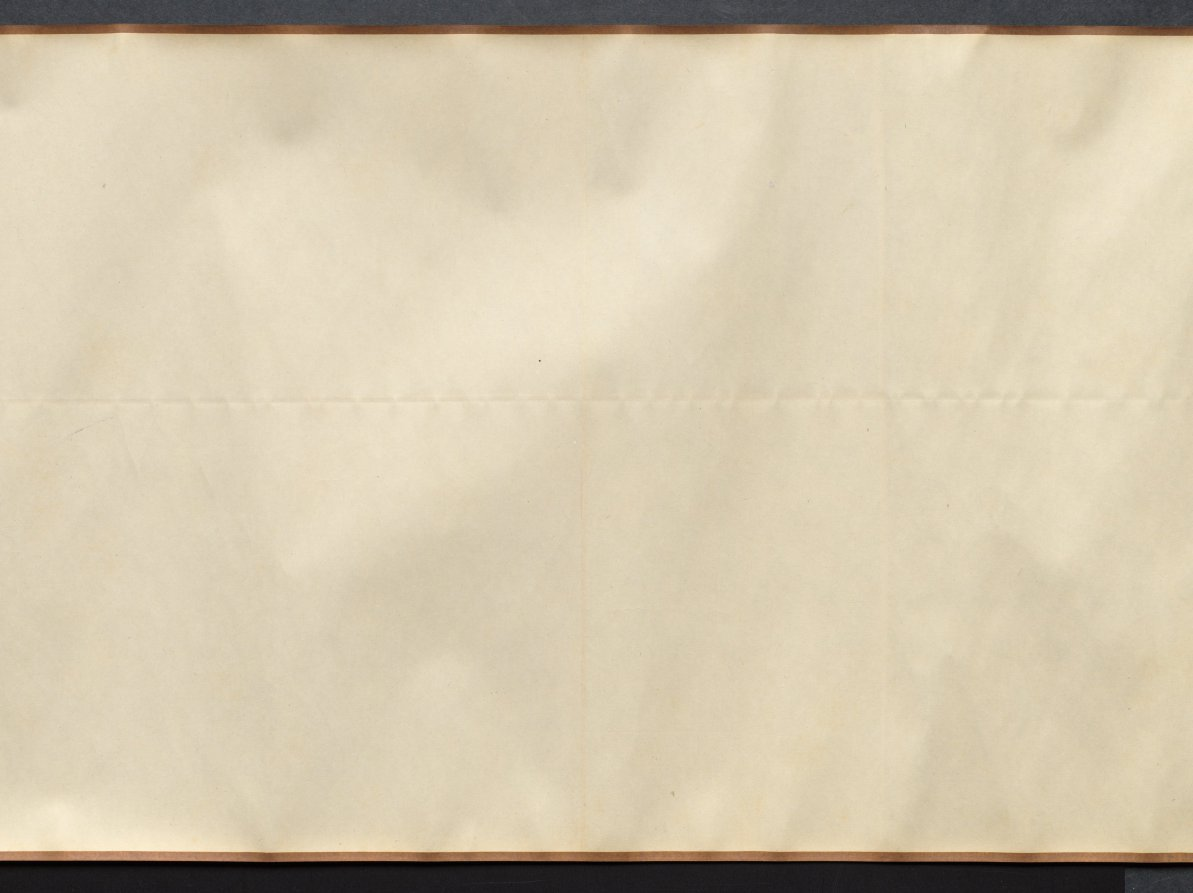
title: Returning to the Village in a Rainstorm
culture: China, Ming dynasty (1368–1644)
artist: Xie Shichen (Chinese, 1487–after 1567)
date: 1530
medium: Handscroll; ink and light color on silk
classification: Painting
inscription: 風雨歸村圖 嘉靖庚寅秋日樗仙謝時臣. [印] 謝時臣印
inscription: 3 additional seals unidentified.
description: This scroll depicts a wind- and rainswept landscape with figures in the countryside struggling against a late summer monsoon rainstorm. Such weather was familiar to residents of the lower Yangzi delta. Xie Shichen spent most of his life in the Suzhou area. Details of his career are scant, but his surviving works suggest that he made his living as a professional painter. This painting conveys drama and anecdotal observations, characteristic of Zhe school paintings, such as the one by Lü Wenying, CMA 1970.76.